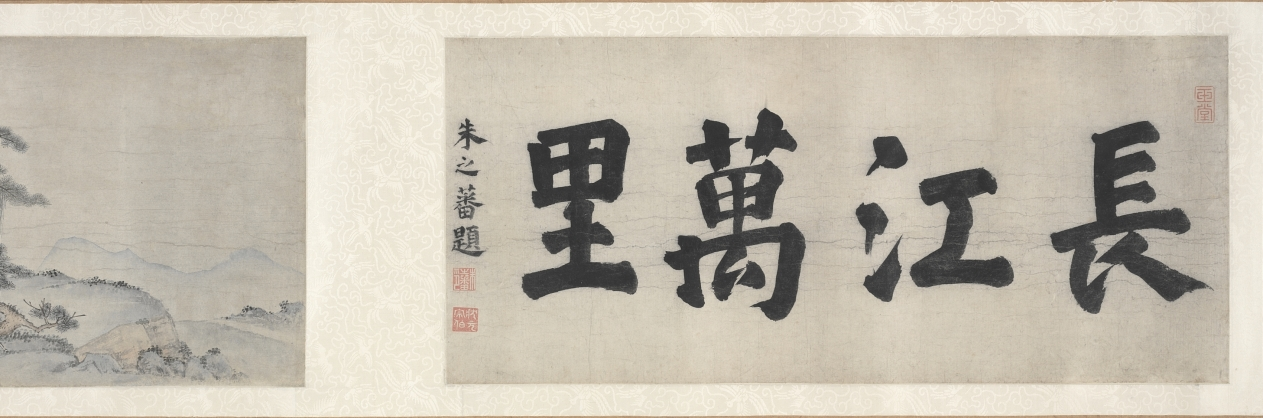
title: Ten Thousand Li of the Yangzi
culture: China, Ming dynasty (1368–1644)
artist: Dai Jin (Chinese, 1388–1462)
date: c. 1400s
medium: Handscroll; ink and color on paper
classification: Painting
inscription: Two colophons at end. Artist's seals: Dai Jin 戴進 and Wenjin 文進.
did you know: Dai Jin is traditionally considered the founder of the Zhe School, a style of landscape painting.